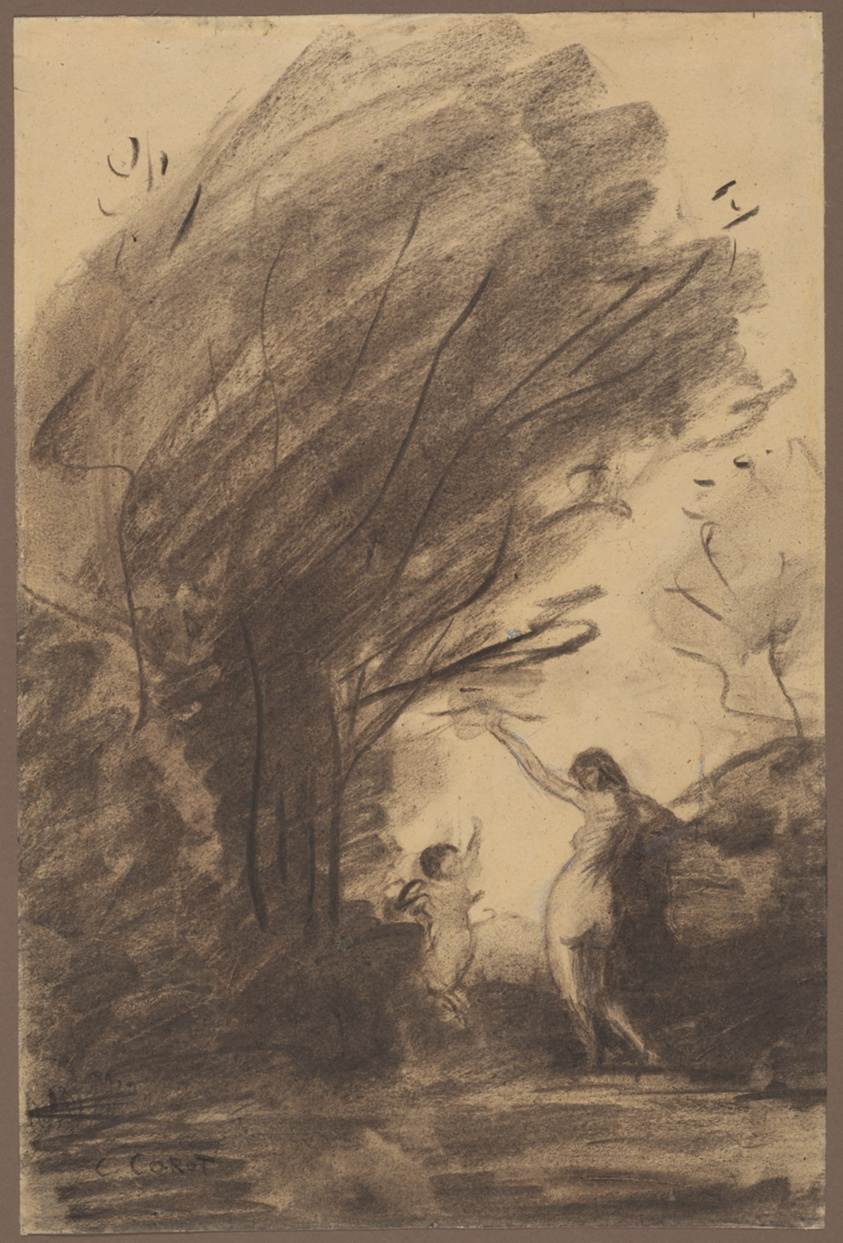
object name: Drawing and Watercolor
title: Venus Disarming Cupid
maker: Jean-Baptiste-Camille Corot; French, 1796-1875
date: 1852/57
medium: Charcoal, with stumping, scraping and erasing, heightened with white gouache, on dark cream wove paper with inclusions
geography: France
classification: charcoal; paper; prints and drawing